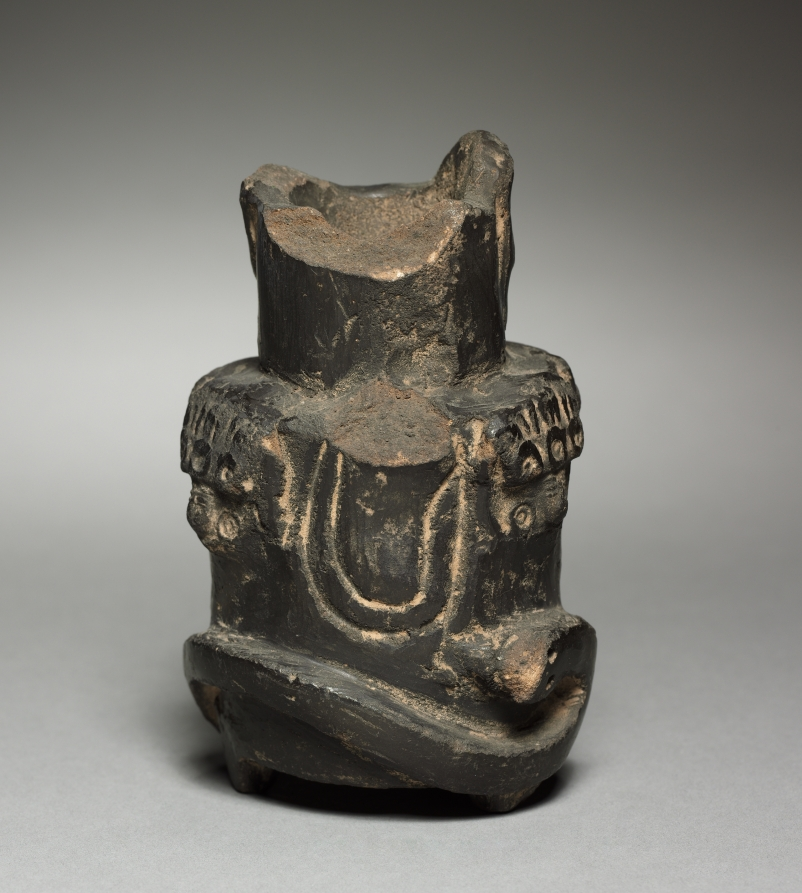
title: Vase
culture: Peru, Tiwanaku style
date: 800–200 BCE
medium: pottery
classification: Ceramic